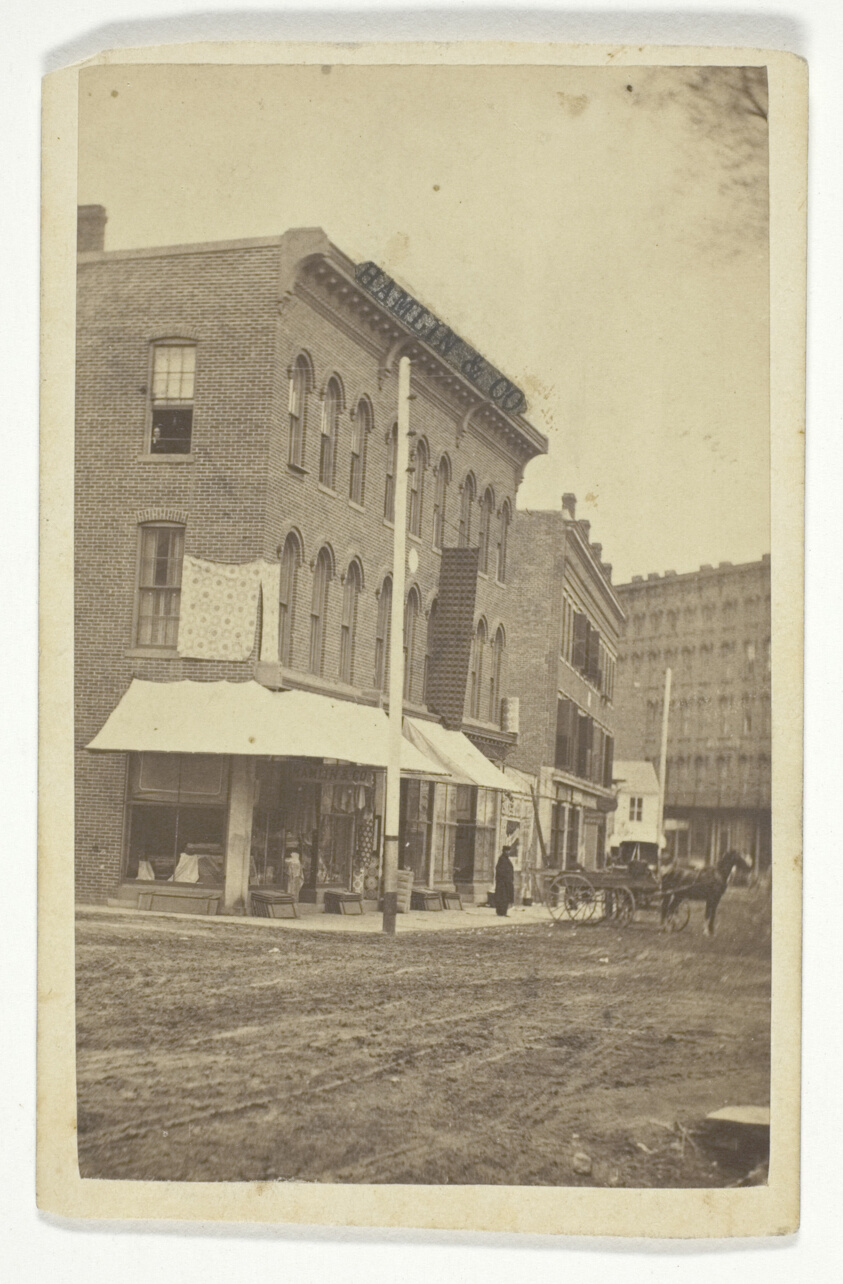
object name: Photograph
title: Hamlin & Co. Store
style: 19th century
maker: L. Thompson (American, 19th century)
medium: Albumen print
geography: United States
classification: photographic process; photography; card photographs; photograph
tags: Collected by Hugh Edwards